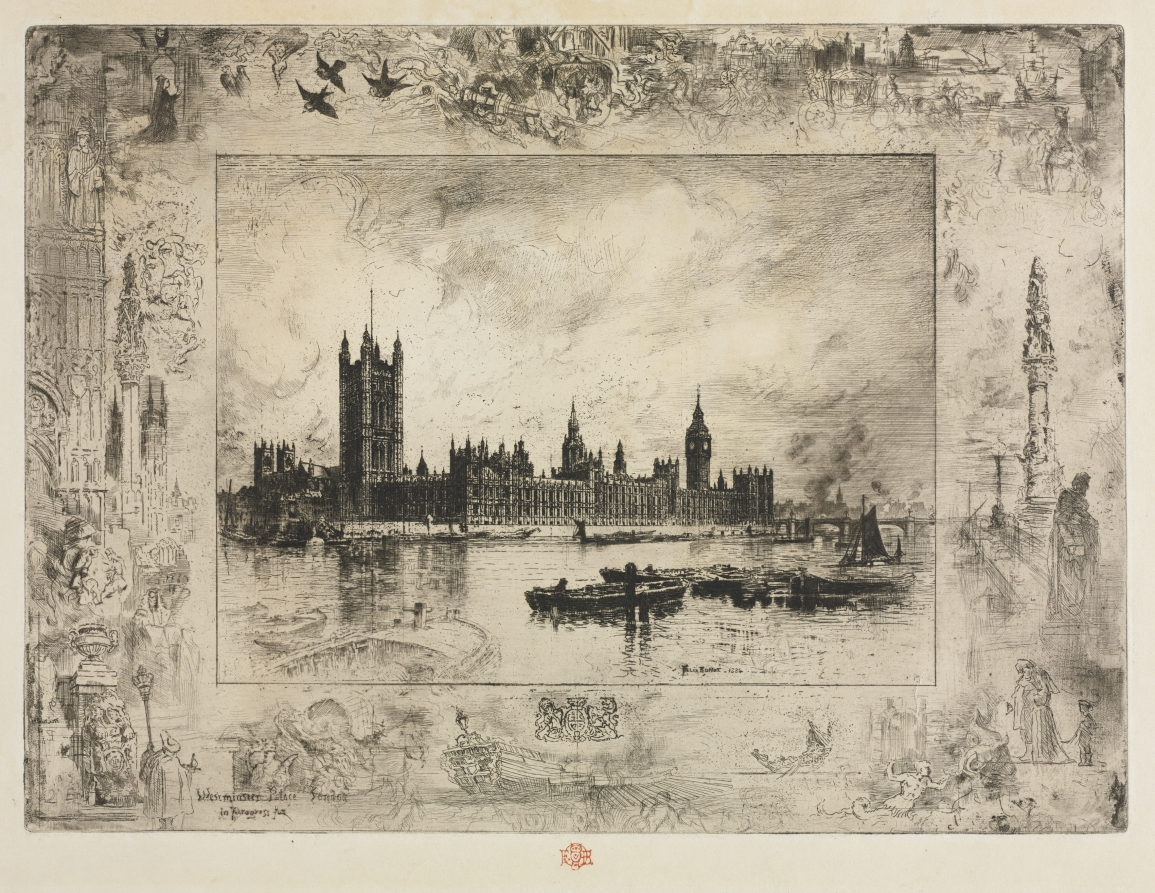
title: Westminster Place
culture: France, 19th century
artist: Félix Hilaire Buhot (French, 1847–1898)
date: 1884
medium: etching, drypoint, aquatint, and roulette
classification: Print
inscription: lower left, in plate: Westminster Palace London/ in progress for